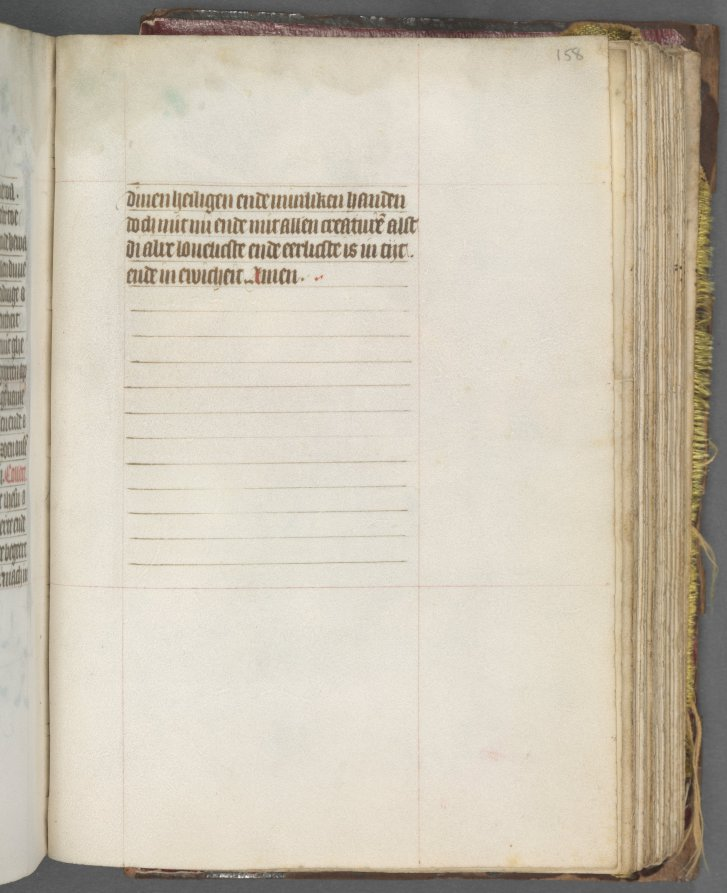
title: Book of Hours (Use of Utrecht): fol. 158r, Text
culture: Netherlands, Utrecht, 15th century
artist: Master of Gijsbrecht van Brederode (Netherlandish)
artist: Master of the Boston City of God (Netherlandish)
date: c. 1460–1465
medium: ink, tempera, and gold on vellum; binding: brown Morocco over original wooden boards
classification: Bound Volume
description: This manuscript is a collaborative effort of two talented illuminators with distinctive styles. Ninety-seven historiated initials (letters containing scenes), including the one on recto (right side) shown here, are by the Master of the Boston City of God, a painter who worked in Utrecht. Four full-page miniatures (small paintings), including the Nativity on the verso (left side), have recently been attributed to the Master of Gijsbrecht van Brederode. The background of the Nativity depicts a distant cityscape (perhaps Utrecht), adjacent to which may be seen the Journey of the Magi and the Annunciation to the Shepherds. In the left margin, the Virgin Mary (above) appears to the Roman Emperor Augustus and the Tiburtine Sibyl, who, according to legend, foretold the coming of Christ. This volume is not written in Latin, but in a Dutch littera textualis, an elegant Gothic bookhand.